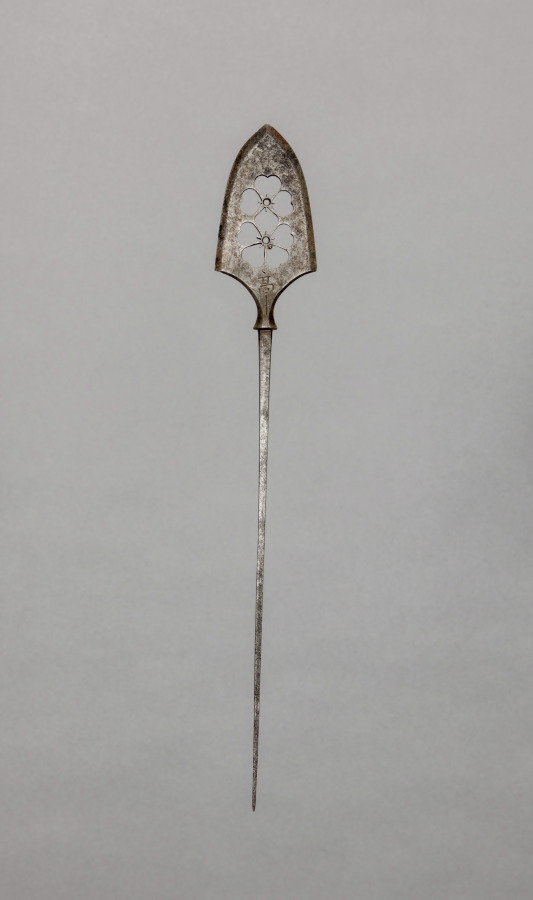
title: Arrow Point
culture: Japan, Edo period (1615–1868)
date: 1700s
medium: steel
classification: Arms and Armor